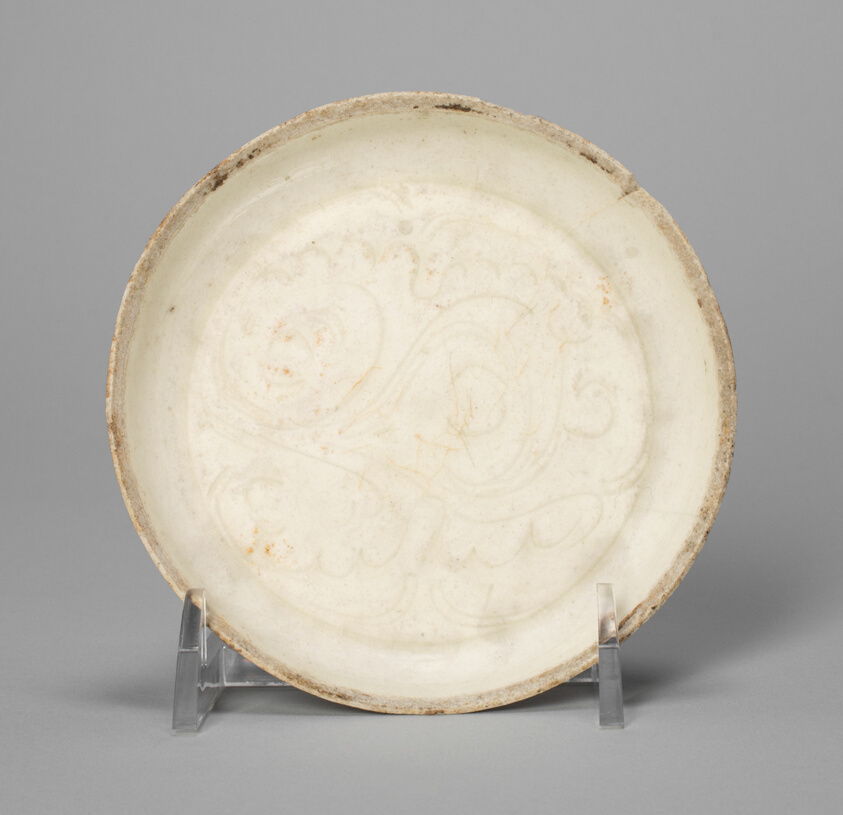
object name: Vessel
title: Saucer-Shaped Dish with Vegetal Scrolls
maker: China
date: Song dynasty (960–1279)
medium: Ding ware; stoneware with underglaze incised decoration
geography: China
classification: ceramics; asian art